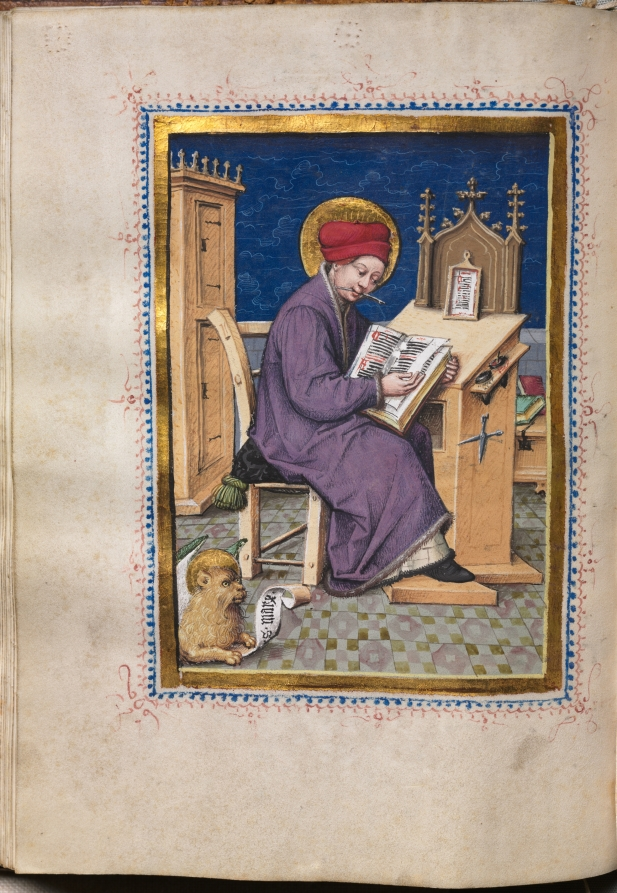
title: Gospel Book with Evangelist Portraits: Saint Mark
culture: Germany, Middle Rhine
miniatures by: Master of the House-Book (German, c. 1470–1500)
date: c. 1480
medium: ink, tempera, and gold on vellum; original blind stamped leather binding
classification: Bound Volume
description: Each of the four gospels, here in Latin, are preceded by a full-page miniature of the appropriate Evangelist. As is conventional, the Evangelists are represented as contemporary scribes seated at a lectern surrounded by all the accouterments of the trade---inkpots, quill pens, penknives, etc. The miniatures' style is characteristically German late Gothic in its expressive use of angular drapery and realistic detail. Each miniature, however, bears the marks of The Hausbuch Master's hand: notice the terrace space for each figure and the emphasis on realistically rendered details, such as the furniture construction and the tools of the scribe as well as the facial types, with their heavy-lidded, downcast eyes. This artist was occasionally noted for his humor, as here in the portrait of the Evangelist John in which he depicted the saint erasing an error in his text with a pen knife in his left hand and a quill pen in his right. The skillful penwork, tracery, vine scrolls, and the large initials are the work of the other artists. The binding is original. The Hausbuch Master is known primarily for an album of lively drawings as well as some ninety copper engravings. He was also a panel painter of some distinction.